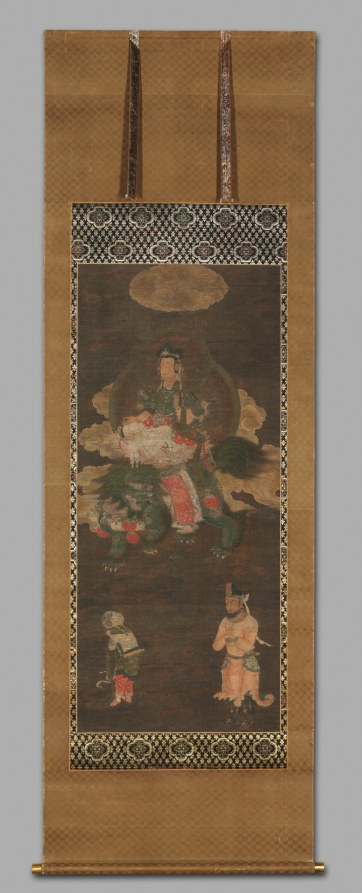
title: Shakyamuni Triad: Buddha Attended by Manjushri and Samantabhadra (Bodhisattva with Lion)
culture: China, Fuzhou, Fujian Province, Yuan dynasty (1271-1368)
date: late 1300s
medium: Hanging scroll; ink and color on silk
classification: Painting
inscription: Inscription at the bottom of the central scroll reads: "Da Song Fuzhou fu…(Fuzhou prefecture of the great Song)."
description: This triptych is a rare example of Yuan Buddhist painting. It depicts the historic Buddha Shakyamuni flanked by two attending bodhisattvas, Manjushri (the bodhisattva of wisdom, riding a lion) and Samantabhadra (the bodhisattva of universal virtue, riding an elephant). Below them are others seeking enlightenment: two disciples of the Buddha (Ananada and Kasyapa), two non-Chinese people, a boy with topknots, and a female worshiper. The clouds above and around the divine beings form one scene that illustrates Shakyamuni’s sermon from the Lotus Sutra. This text became an important basis for Buddhist faith throughout East Asia and was central to the Mahayana school of Buddhism.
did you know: Manjushri, the bodhisattva of wisdom, leads the child Sudhana on his quest for enlightenment.